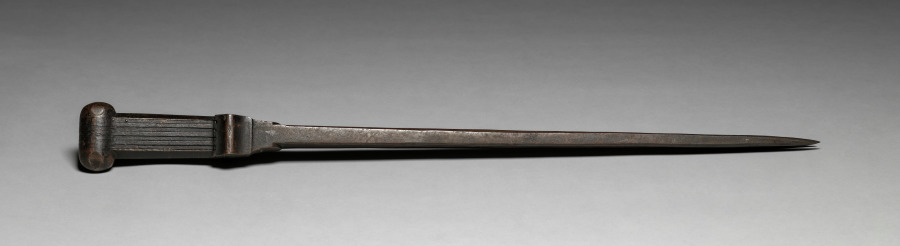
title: Dividers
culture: Germany (?)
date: 1500s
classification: Tool